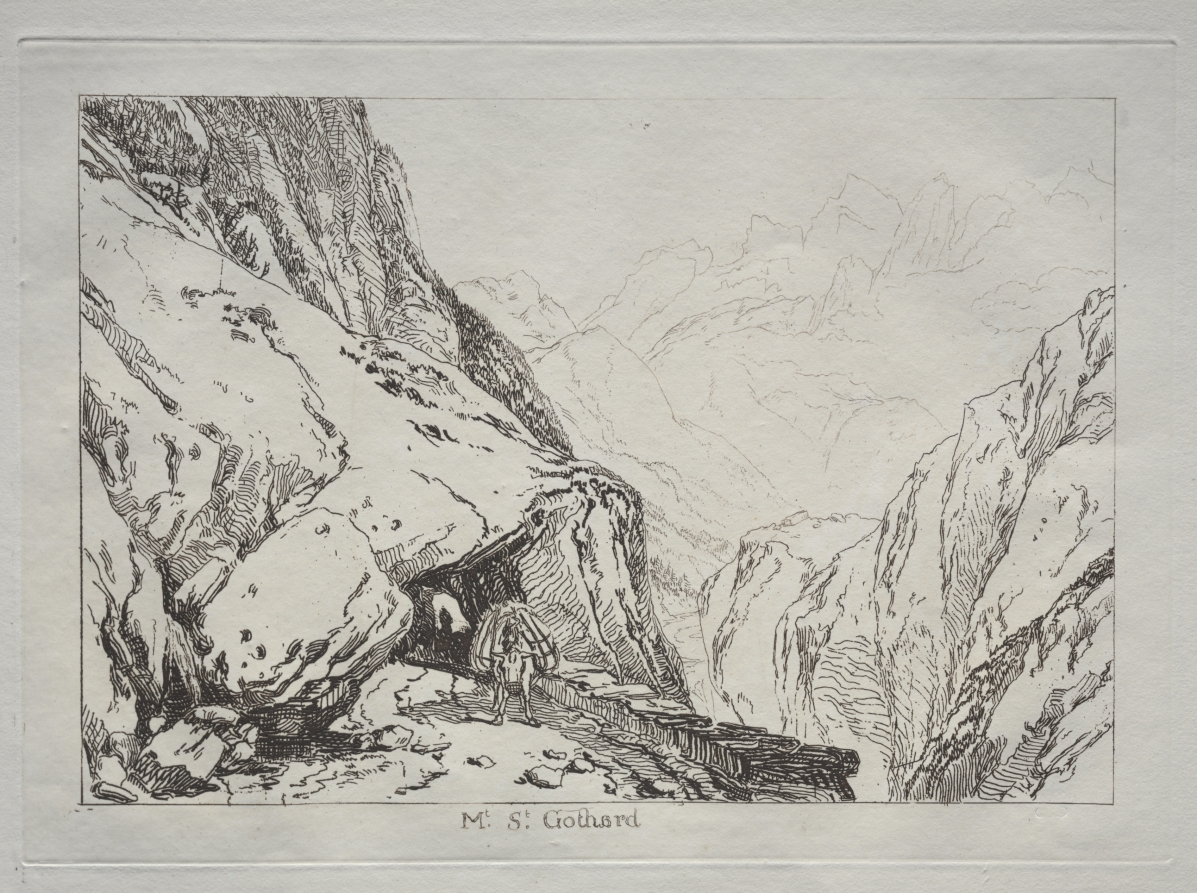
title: Liber Studiorum: Mt. St. Gothard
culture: England, 19th century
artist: Joseph Mallord William Turner (British, 1775–1851)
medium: etching and mezzotint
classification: Print